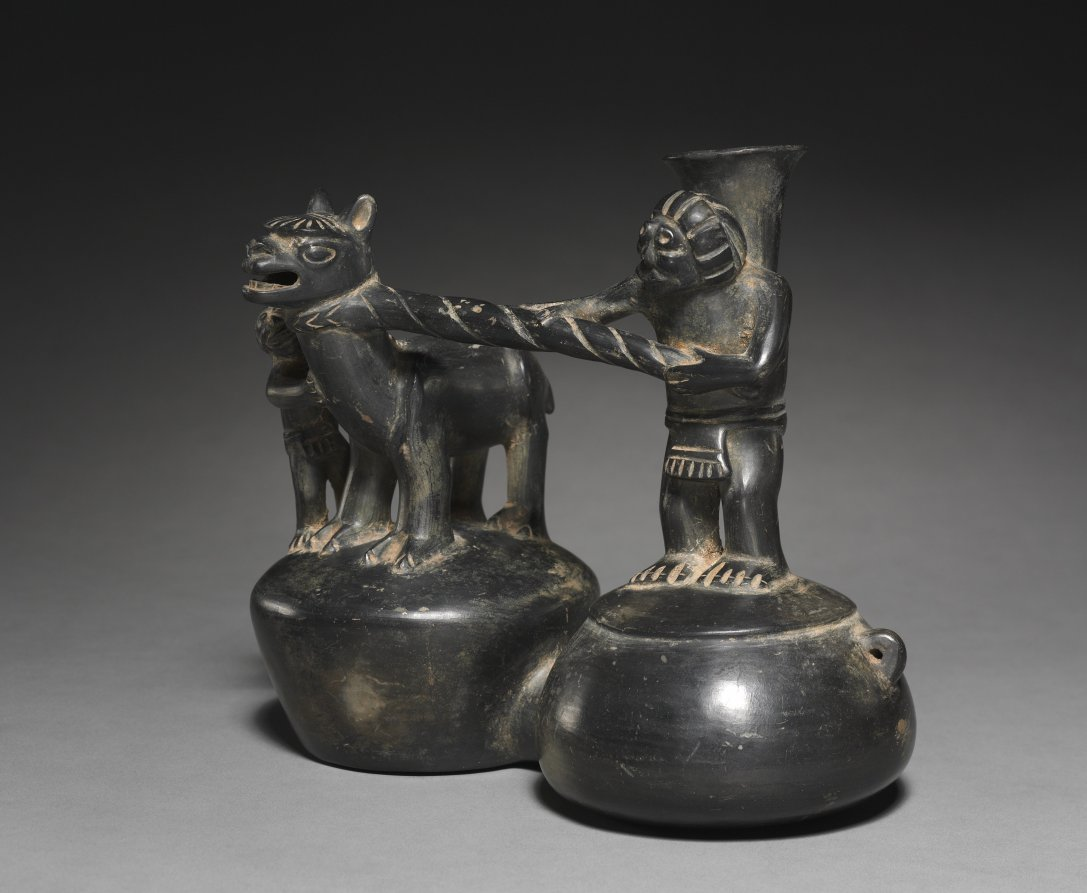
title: Double-chambered Vessel with Figures and Camelid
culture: Andes, Chimú-Inka, late 15th - mid 16th century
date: 1470–1532 (Thermoluminescence date, 1310–1610)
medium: ceramic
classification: Ceramic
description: Under the Chimú, ceramic seems to have been a less important artistic medium than for earlier north coast cultures. Accordingly, ceramics were mass-produced with molds and, rather than bearing painted scenes, often have an overall dark surface achieved by firing in a smoky atmosphere. The double-chambered vessel was made after the Inka conquered the Chimú in the 1460s.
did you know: When this vessel is filled with liquid and tilted back and forth, the camelid emits a whistling sound.